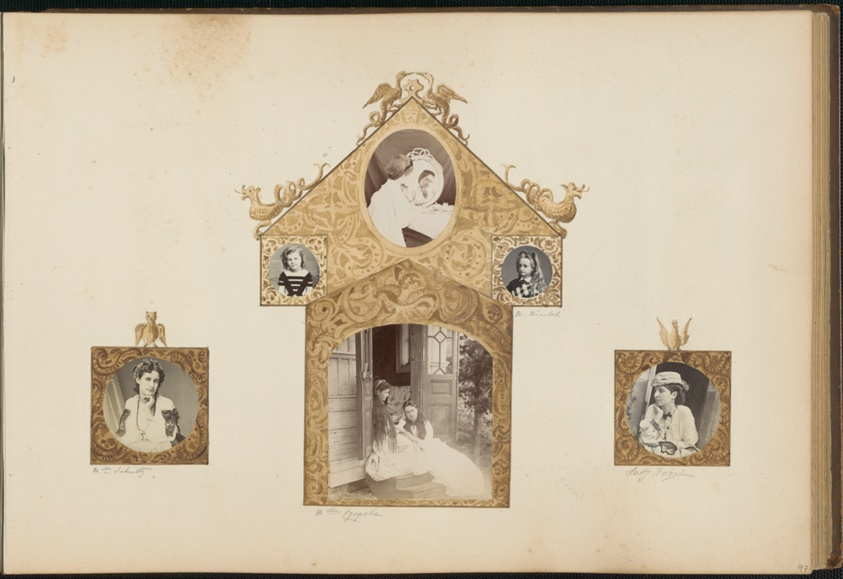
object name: Photograph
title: The Madame B Album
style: 19th century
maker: Marie-Blanche Hennelle Fournier (French, 1831–1906)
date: 1870s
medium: Albumen prints with watercolor (in album)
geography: France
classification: photograph; albumen silver print; photography